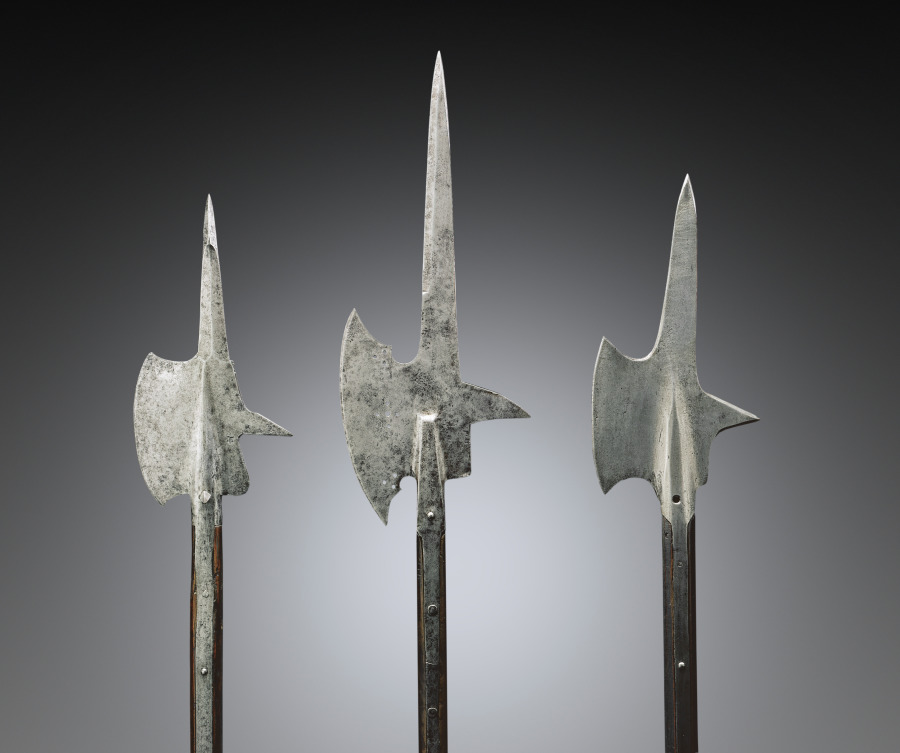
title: Halberd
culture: Germany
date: c. 1520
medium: steel, pierced quatrefoil; rectangular wood haft with planed corners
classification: Arms and Armor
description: The halberd was a staff weapon favored by European infantries (foot soldiers) of the 1400s and 1500s for its versatility and deadly effect. The word halberd comes from the German words Halm (staff) and Barte (axe). The halberd is, in fact, an axe that served multiple functions: the axe blade was used for hacking, the spike for thrusting, and the beak for piercing plate armor or for pulling a knight from his saddle. The halberd was used by shock troops (those who lead an attack) and by Swiss and German mercenaries. After about 1550, the halberd gradually became less functional. Its large blade provided space for coats of arms and insignia. By the late 1500s, the parade halberd had become a ceremonial weapon for palace guards.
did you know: A halberd requires the use of both hands and so a halberdier cannot carry a shield for protection.